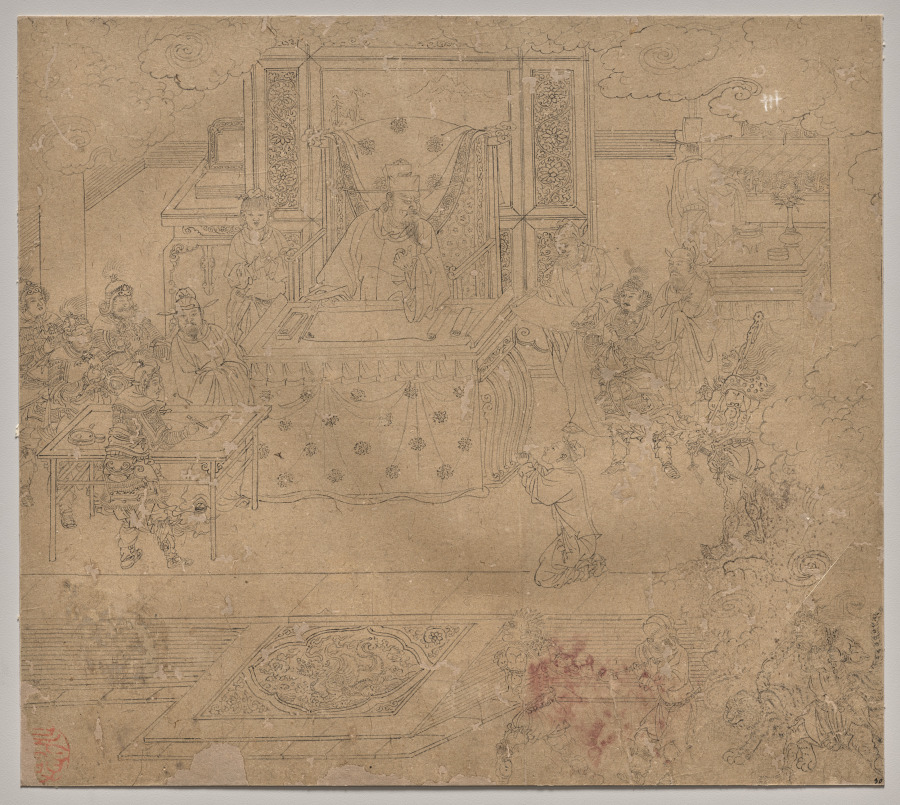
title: Album of Daoist and Buddhist Themes: Kings of Hells: Leaf 30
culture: China, Southern Song dynasty (1127-1279)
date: 1200s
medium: Album, ink on paper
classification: Painting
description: This extraordinary album has 50 paintings on a variety of religious subjects. They were likely created by several master craftsmen to share with studio apprentices as models for fulfilling commissions. The Jade Emperor and the Daoist pantheon make up the first 26 leaves. The next 14 leaves portray the Buddhist Ten Kings of Hell administering punishments to the dead. The third section, called “Clearing the Mountains,” features divine soldiers, led presumably by the deity Erlang Shen 二郎神, fighting undesirable creatures.